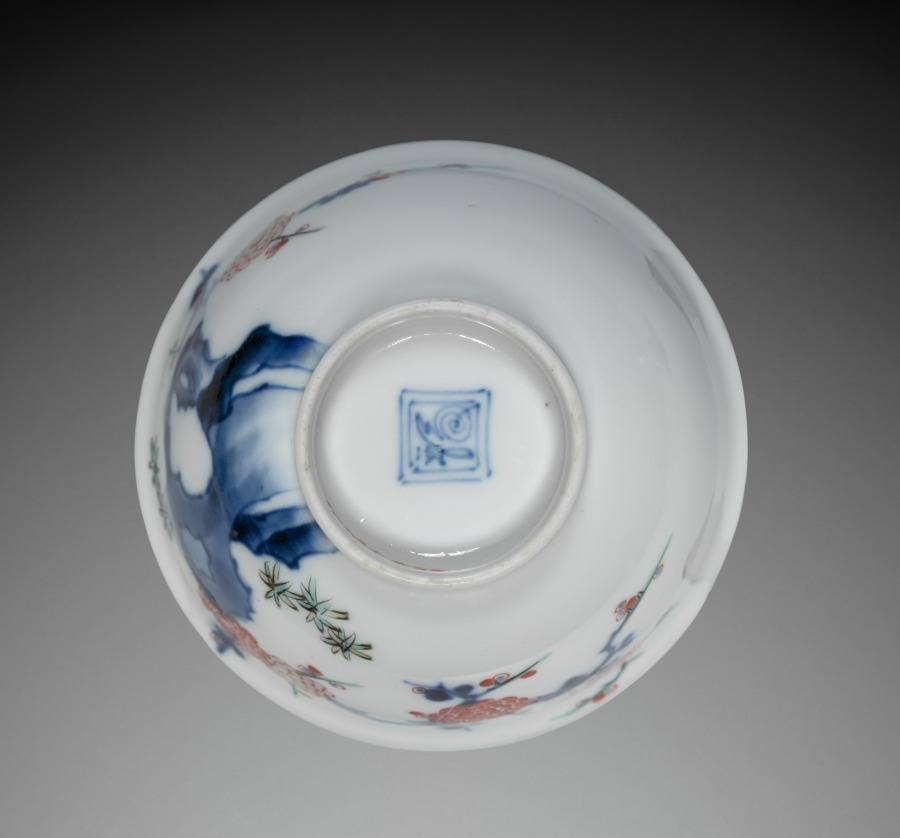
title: Cup with Plum and Rock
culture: Japan, Edo period (1615–1868)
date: 1700s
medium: porcelain with underglaze blue and overglaze enamel decoration (Hizen ware, Ko-Kutani type)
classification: Ceramic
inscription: 福